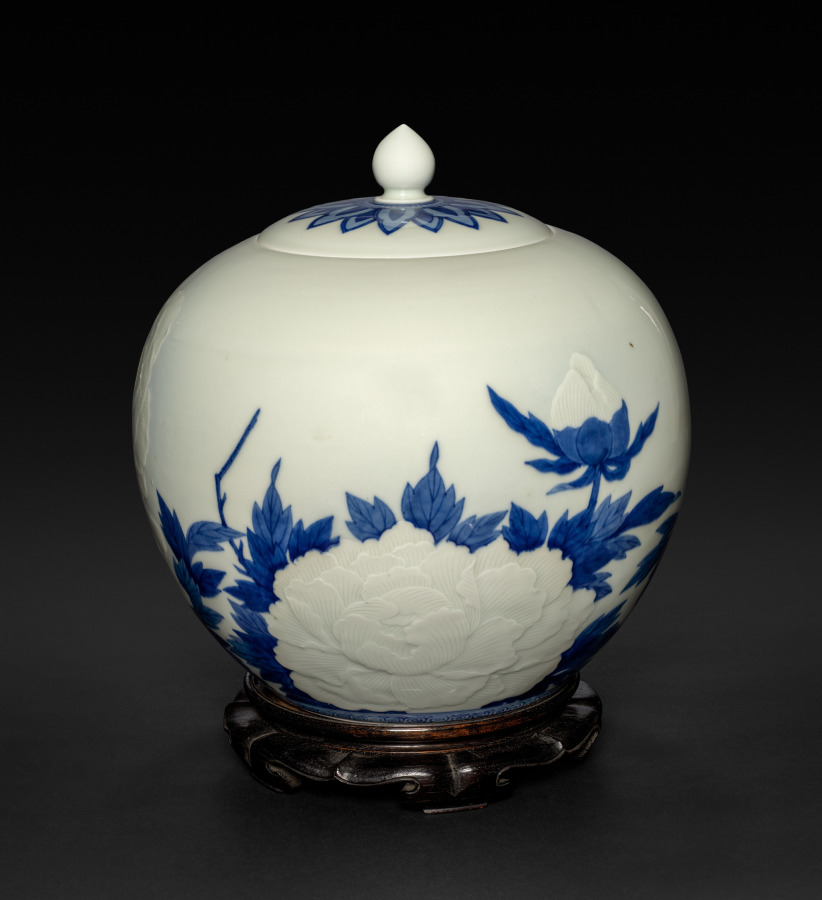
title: Lidded Jar with Peonies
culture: Japan, Meiji period (1868–1912)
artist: Seifū Yohei III (Japanese, 1851–1914)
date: 1897–1912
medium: Porcelain with molded and carved design and underglaze color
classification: Ceramic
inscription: 大日本清風造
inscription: 金聲玉振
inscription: 帝室技芸員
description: The petals of the large, white peonies on this jar were made by applying molded clay to the body and incising the clay with lines for definition. The flowers’ centers were then painted with yellow, along with the leaves in cobalt blue line and wash. A subtle blue gradation was also added all around the flowers using a masking method. The lid, with its treasured jewel-shaped finial, was also decorated with foliate motifs in underglaze cobalt blue. Finally, a transparent glaze was applied over the entire body of both the jar and lid. It is a special demonstration of Yohei III’s use of precision and control to create a completely balanced composition.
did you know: Seifū Yohei III drew inspiration from Qing dynasty Chinese wares but experimented widely with new glazing techniques.